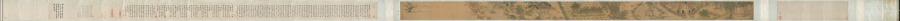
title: Garden for Solitary Enjoyment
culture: China, Ming dynasty (1368–1644)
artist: Qiu Ying (Chinese, 1494–1552)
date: 1515–52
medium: Handscroll; ink and light color on silk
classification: Painting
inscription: Accompanying text of an essay together with seven poems of Sima Guang (1019–1086) and one poem of Su Shi (1037–1101) written by Wen Zhengming (1470–1559) in 1558.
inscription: 2 colophons and 82 seals: 4 seals of Wen Zhengming 文徵明 (1470–1559); 59 seals of Xiang Yuanbian 項元汴 (1525–1590); 1 colophon, dated 1644, and 7 seals of Xiang Yukui 項禹揆 (c. late 1500s–1659); 1 colophon, dated 1880, and 2 seals of Weng Tonghe 翁同龢 (1830–1904); 2 seals of Ch'eng Chen-i (19th c.); 1 seal of Han Ch'ung (19th c.); 4 seals of Wan-go H. C. Weng 翁萬戈 (1918–2020); 3 seals unidentified.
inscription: Colophon by Xiang Yukui 項禹揆 (c. late 1500s–1659): The painting of The Garden for Self-enjoyment on the right by Shih-chou, Mr. Qiu [Qiu Ying] is in the style of Li Lung-mien. Its mood is peaceful, as if meeting the ancient gentlemen face to face among the brushes and silk; it lifts one above the sordid bustle of life. Formerly, my late father handed me this scroll which had only the painting without the written essay. I considered asking a good calligrapher to write the essay to add to it but was afraid that the quality of the writing would not match the painting. Several years later, I saw at a friend's house this essay and poems (of Ssu-ma Kuang] written by Hengshan [Wen Zhengming], once owned by my grandfather; so I spared no expense to obtain it. I rejoiced at this and said: "The divine swords are finally united. How things are pre-destined!" Now my friend Chang Kung-chao's technique for mounting [painting and calligraphy] is excellent. Therefore by daring to take them out and join them together, I can preserve this beautiful story of singular reunion. Xiang Yukui recorded at Hai-yeh-t'ang [hall] two days before New Year's Eve in the jiasheng year of the Chongzhen era [1644]. trans. LYSL/HK/WKH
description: Garden of Solitary Enjoyment refers to a site built in 1073 by the statesman Sima Guang (1019–1086) after he had retired to Luoyang, Henan province. Every spring, visitors would flock to his garden. Each of its seven structures references a historic figure. Sima wrote: I channel streams [like Du Mu], to water flowers [like Bai Juyi], or trim bamboo [like Wang Huizhi]. . . . I know of no joy between heaven and earth that could take its place. Qiu Ying’s painting, created after an 11th-century version of the same theme, must have appealed to garden owners of the Ming dynasty, since it became the template for numerous Suzhou workshop copies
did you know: Sima Guang completed his monumental survey of Chinese history, Zizhi tongjian, in the garden depicted in this painting.